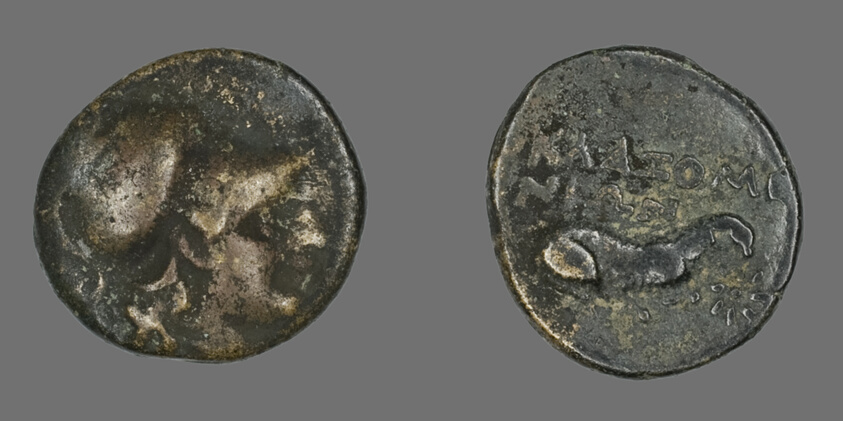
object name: Coin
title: Coin Depicting the Goddess Athena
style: greek, ancient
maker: Greek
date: 387-301 BCE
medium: Bronze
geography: Ancient Greece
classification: coin; ancient art